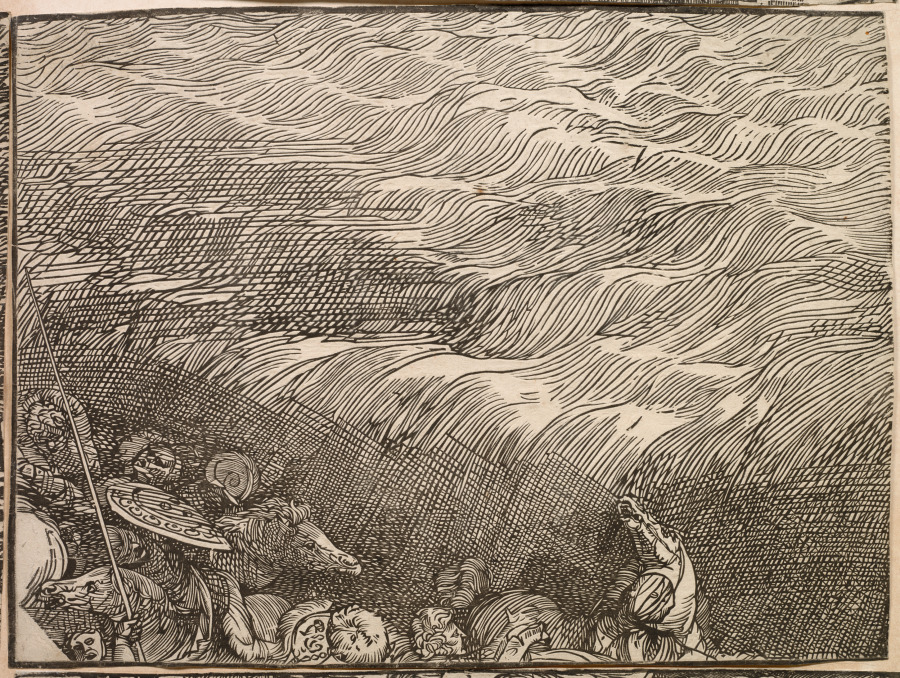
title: The Submersion of Pharaoh's Army in the Red Sea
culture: Italy, Venice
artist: Titian (Italian, c. 1488–1576)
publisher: Domenico dalle Greche (Italian, 1503–1603)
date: 1514–15, printed 1549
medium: woodcut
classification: Print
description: To make this monumental woodcut—considered one of the most ambitious prints of the Renaissance—Titian probably drew directly on the wooden blocks, after which a skilled cutter completed the blocks. The size rivals that of a painting, and the composition would have hung on a wall. Titian’s bold vision presents nature as a vehicle of God’s mercy and wrath. Moses, at right, having parted the seas for the Israelites to pass, commands them to close over the Egyptian forces (Exodus 14:21–31). Titian propelled the narrative with remarkable unity, dedicating entire blocks to the turbulent sea and rolling clouds that culminate in a magnificent cliff and Renaissance city. Some have interpreted the scene as an allegory of Venice’s troubles with the League of Cambrai, a military alliance that threatened the island city.